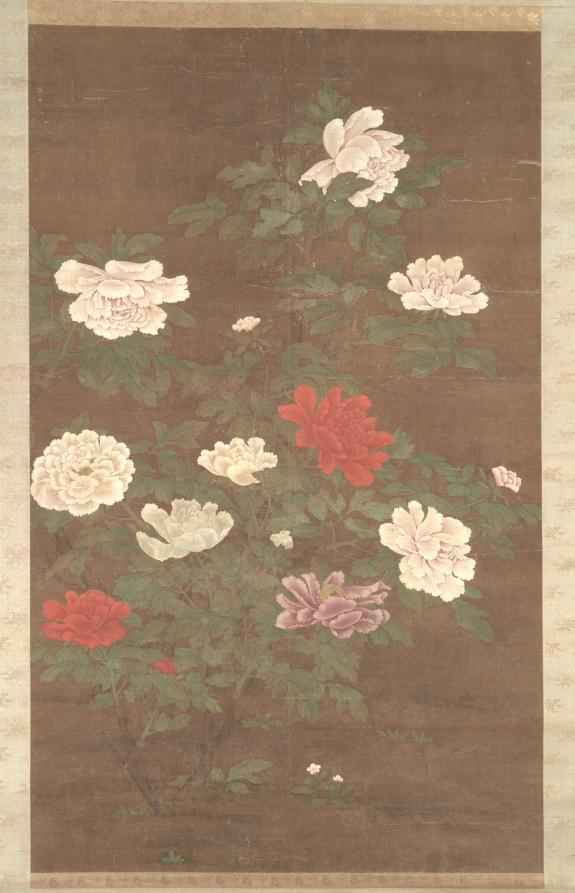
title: Peonies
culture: China, Yuan dynasty (1271-1368)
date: late 1200s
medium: hanging scroll, ink and color on silk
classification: Painting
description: In China, the peony is considered the Queen of Flowers, representing the late spring season. The shrubs of this tree peony are in full bloom, blossoming in various colors. Peony paintings were popular from the Southern Song period to the Ming dynasty. The large scale of this decorative scroll suggests that it may have been hung in a reception hall, conveying good wishes for wealth and prosperity.